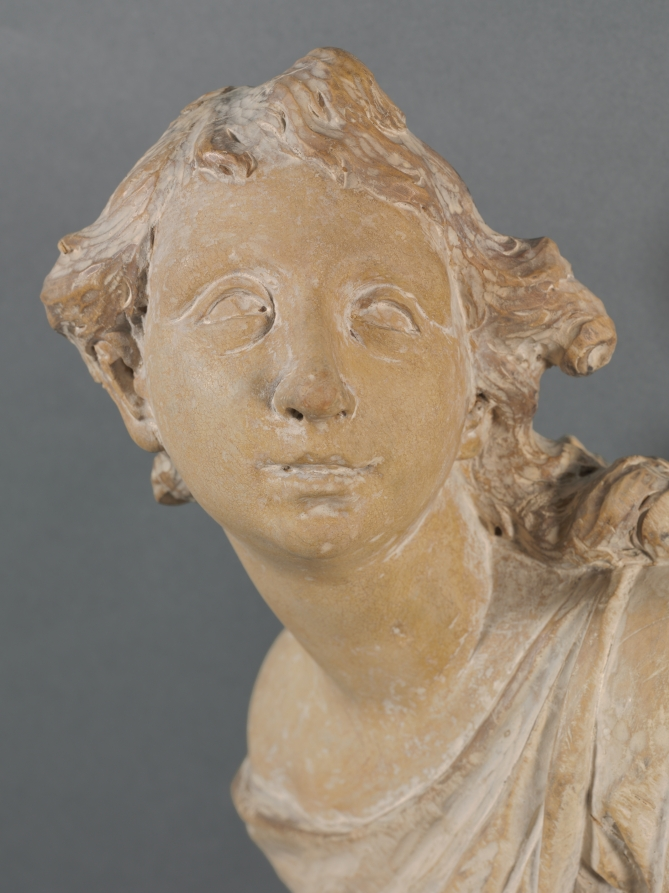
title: Kneeling Angel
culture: Germany, Munich, 18th century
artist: Ignaz Günther (German, 1725–1775)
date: c. 1760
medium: gessoed and painted wood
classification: Sculpture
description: This angel, and another now in the Philadelphia Museum of Art, were probably originally placed on either side of a tabernacle—a structure designed to hold the consecrated bread and wine of the Eucharist—on an altar in a Christian church or private chapel. The angels would originally have had wings, and the now plain surface of the sculpture would have been painted or gilded. Ignaz Günther was among the most sought-after carvers of religious sculpture in southern Germany. His virtuoso skill is particularly evident here in the angel’s pious expression and elegantly formed hands and feet.